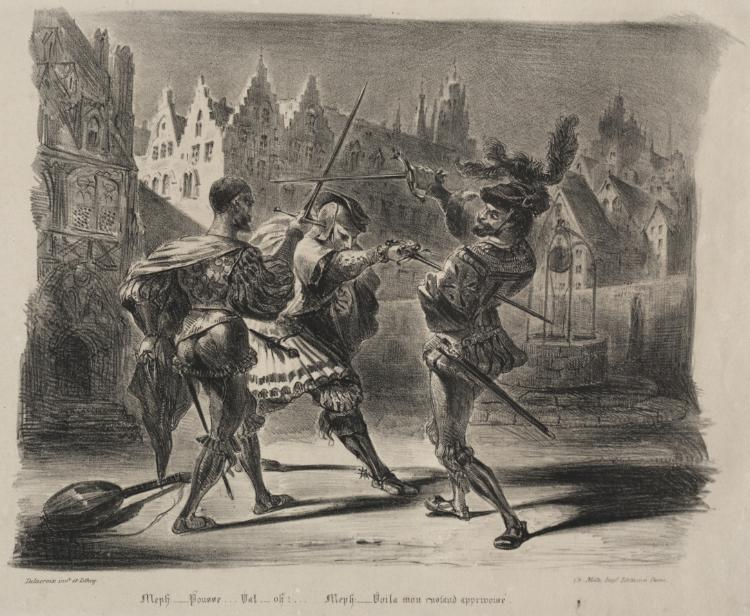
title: Illustrations for Faust: Duel of Faust and of Valentin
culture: France, 19th century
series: Faust: Tragédie de M. de Goethe, translated into French by Albert Stapfer.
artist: Eugène Delacroix (French, 1798–1863)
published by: Chez Ch. Motte, Éditeur, distributed by Chez Sautelet, Libraire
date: 1828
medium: lithograph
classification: Print